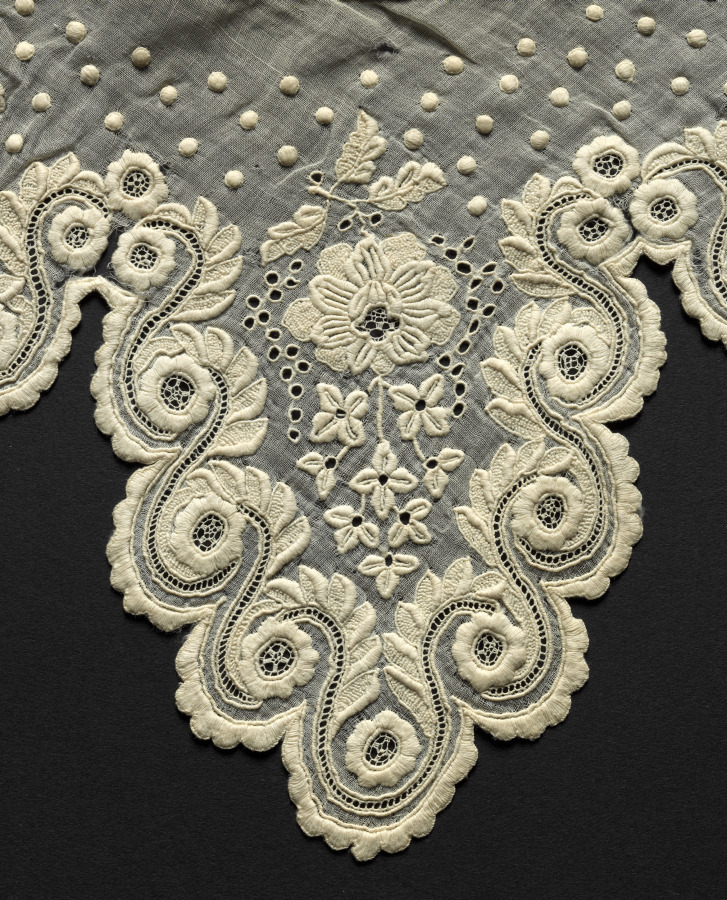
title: Lace and Embroidery Collar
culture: Madeira(?)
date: 1800s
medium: Plain weave linen or cotton(?): needle lace (cutwork) and embroidery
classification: Embroidery